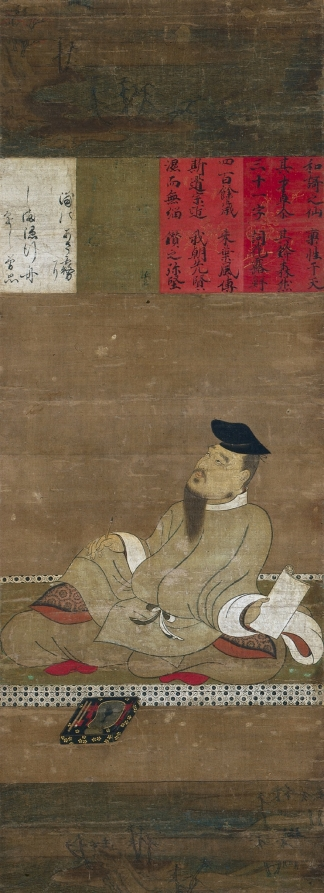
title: Kakinomoto no Hitomaro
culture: Japan, Kamakura period (1185–1333)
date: early 1300s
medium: hanging scroll; ink and color on silk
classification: Painting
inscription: 浦のあさ霧にしま隠れゆく舟をしぞ思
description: Among Japan’s greatest poets, Kakinomoto no Hitomaro’s (c. 660–724) portrait was often displayed at poetry competitions. Here, he gazes up at a falling cherry blossom, his writing box before him, brush and paper in his hands. A short biography and one of his poems are inked on painted rectangles meant to look like decorated papers. The first part of the poem has been mostly lost, but from what remains, it is possible to recognize it as Dimly, dimly in the morning mist that lies over Akashi Bay, my longings follow with the ship that vanishes behind the distant isle. —Translated by Robert H. Bower and Earl Roy Miner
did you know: The landscapes at the top and bottom of the painting depict Akashi Bay, with its famous pines along the shore, and a lone figure in a boat.